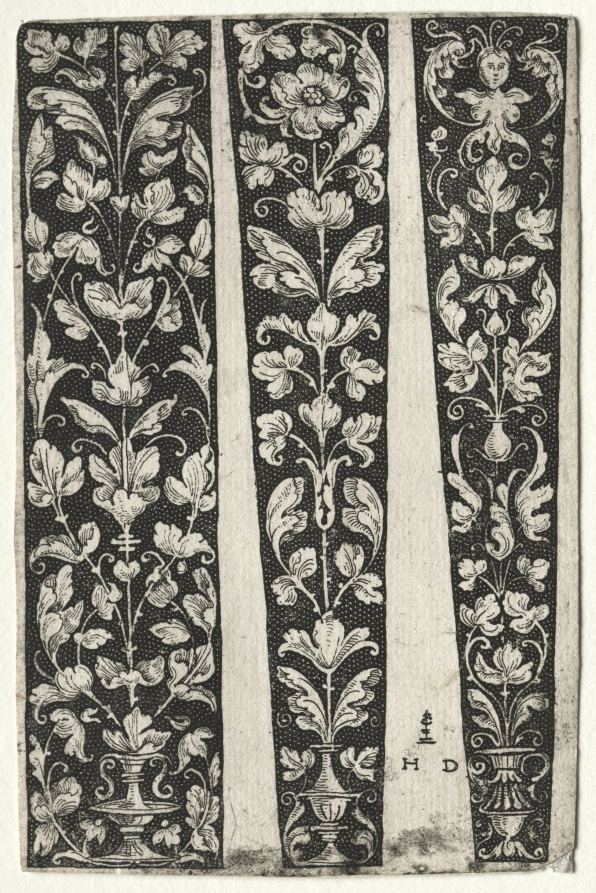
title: Ornamental Fillet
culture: Germany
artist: Daniel Hopfer (German, c. 1470–1536)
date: 1500–1533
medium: etching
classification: Print